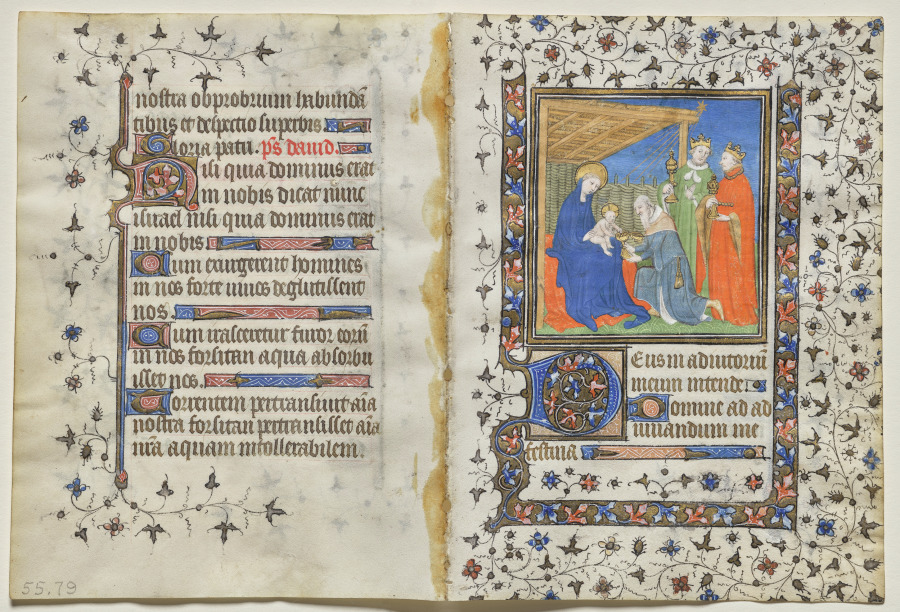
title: Bifolio from a Book of Hours: Adoration of the Magi (recto)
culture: France, Paris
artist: workshop of Boucicaut Master (French, Paris, active about 1410–25)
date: c. 1415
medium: ink, tempera, and gold on vellum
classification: Manuscript